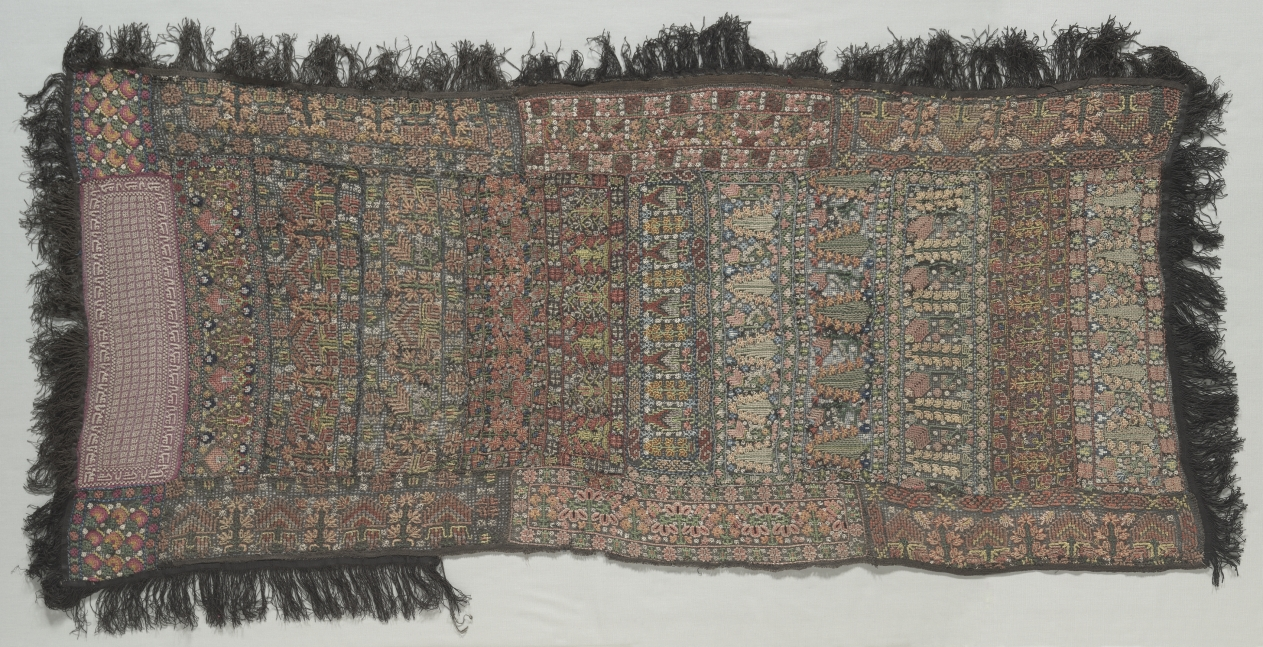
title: Embroidered Shawl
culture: Turkey, 18th century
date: 18th century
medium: embroidery: silk on cotton and silk net ground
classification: Embroidery